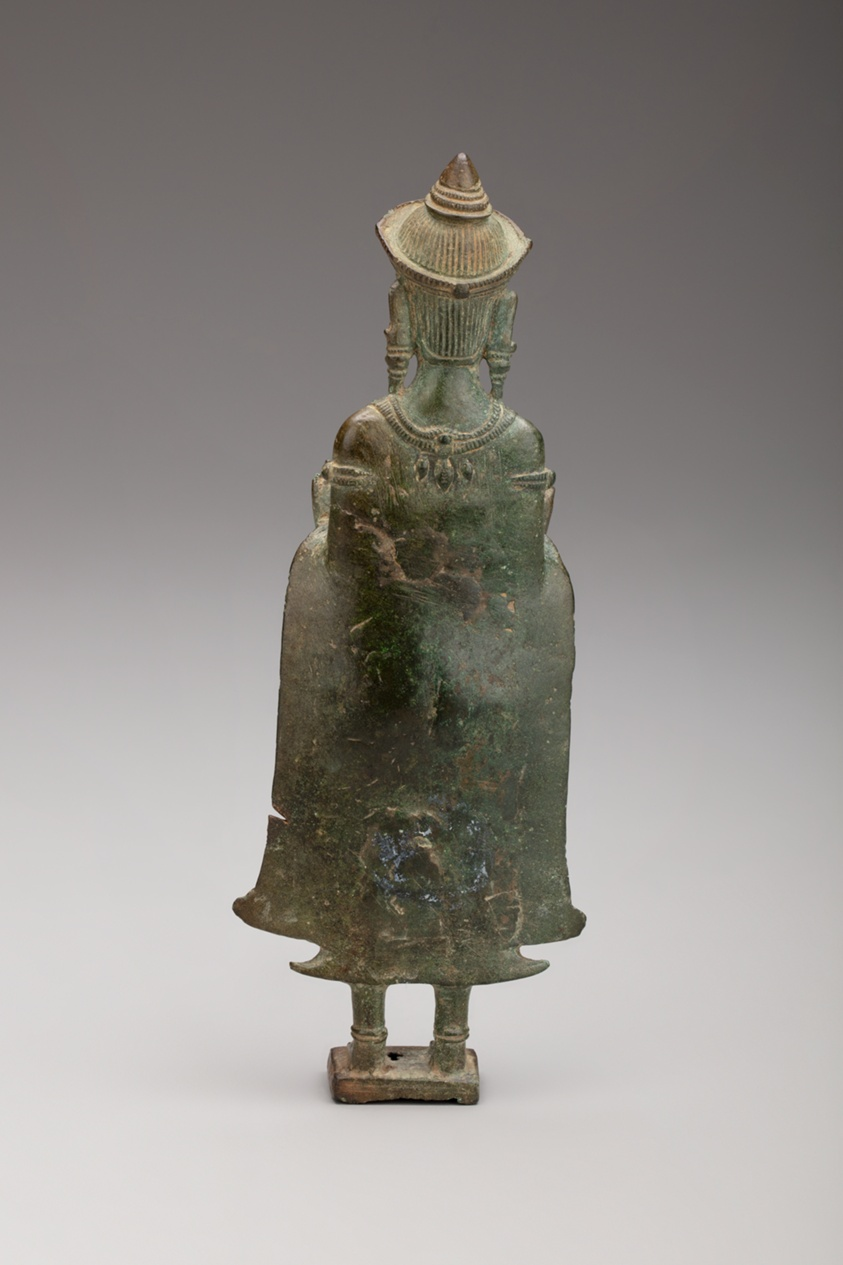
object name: Sculpture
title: Crowned Buddha with Hands in Gesture of Teaching <em>(Vitarkamudra)</em>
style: Southeast Asian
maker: Thailand or Cambodia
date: Angkor period, 12th century or later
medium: Bronze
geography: Thailand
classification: bronze; asian art; sculpture